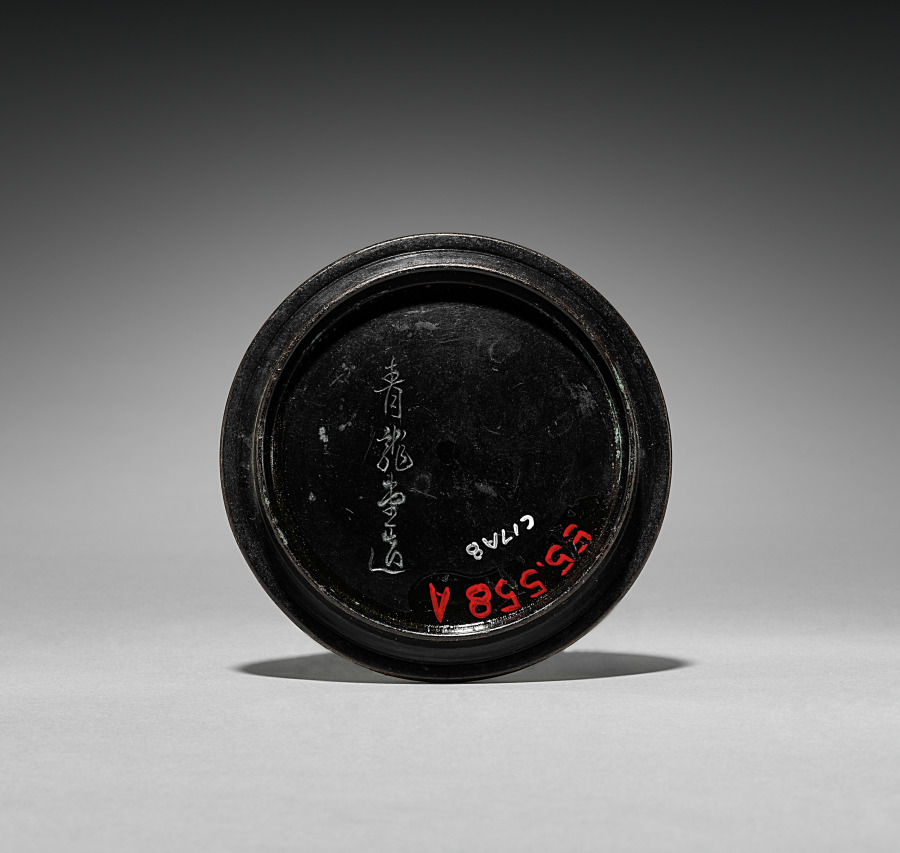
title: Cover for Tea Kettle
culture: Japan, Edo period (1615–1868)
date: 1615–1868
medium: iron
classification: Metalwork